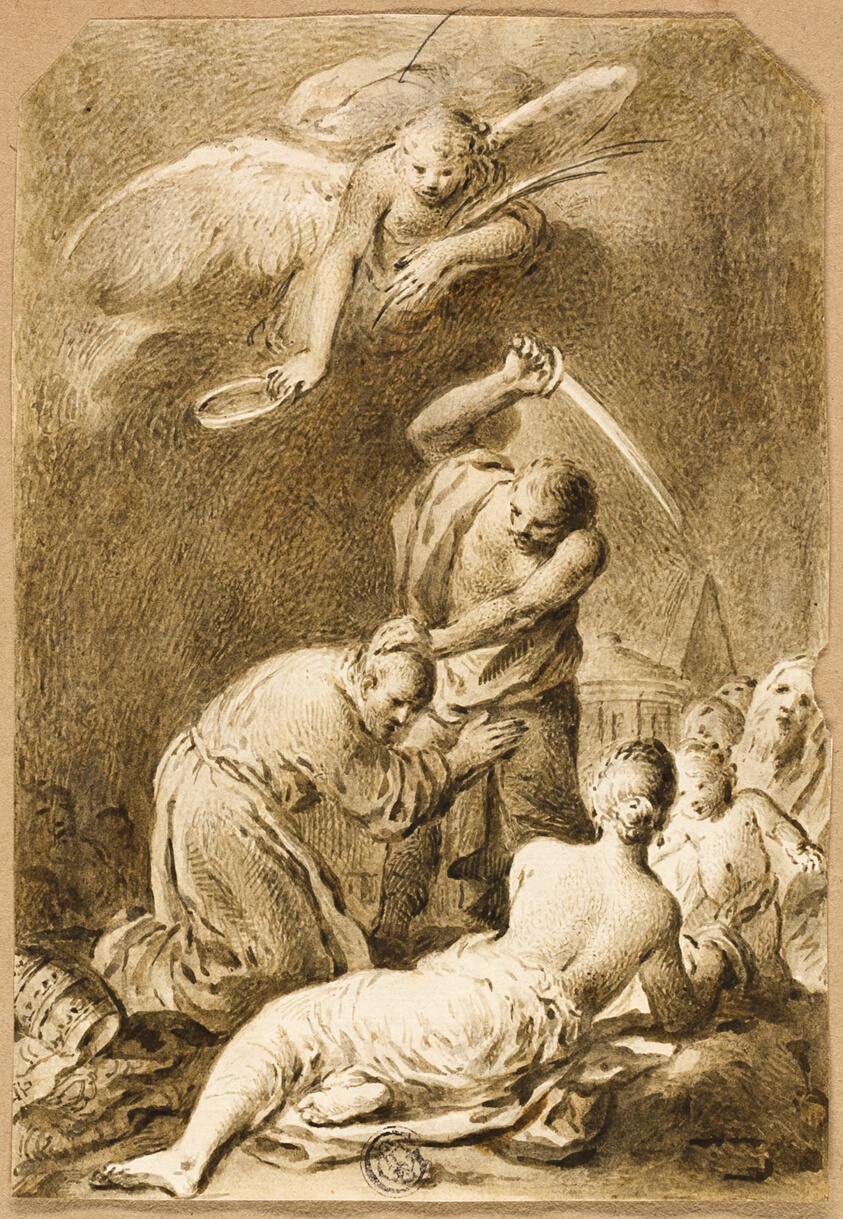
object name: Drawing and Watercolor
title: Martyrdom of a Saint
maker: José Camarón y Boronat (Spanish, 1731-1803)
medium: Brush and brownish-green wash with pen and brown ink on ivory laid paper tipped onto light brown wove paper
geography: Spain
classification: drawings (visual works); prints and drawing